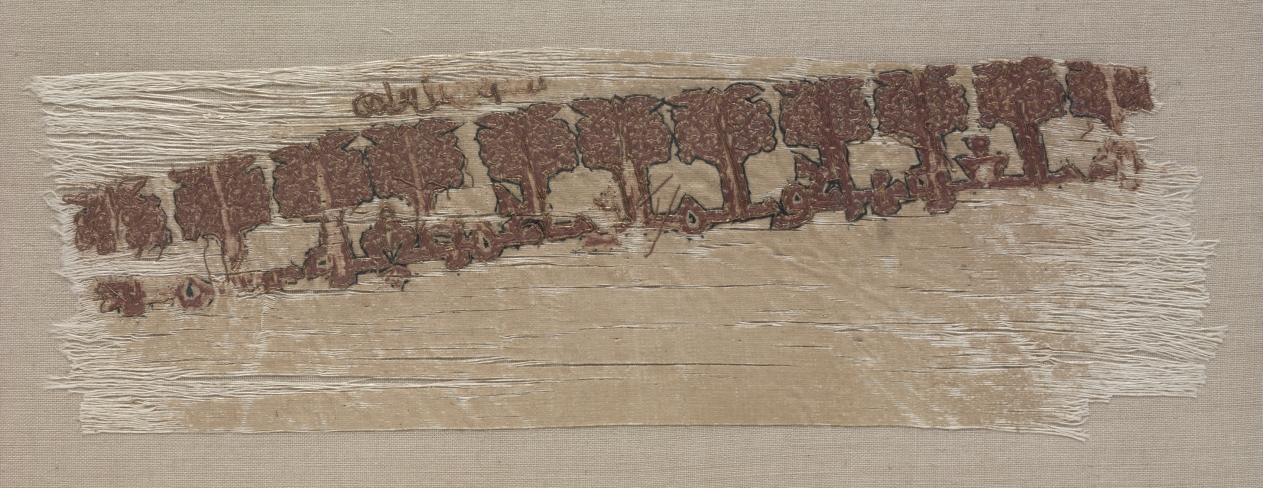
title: Fragment of an Embroidery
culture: Iran or Iraq, Seljuk period, 12 century A.D.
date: 1100s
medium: embroidery in silk and gold filé on mulham tabby ground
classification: Embroidery